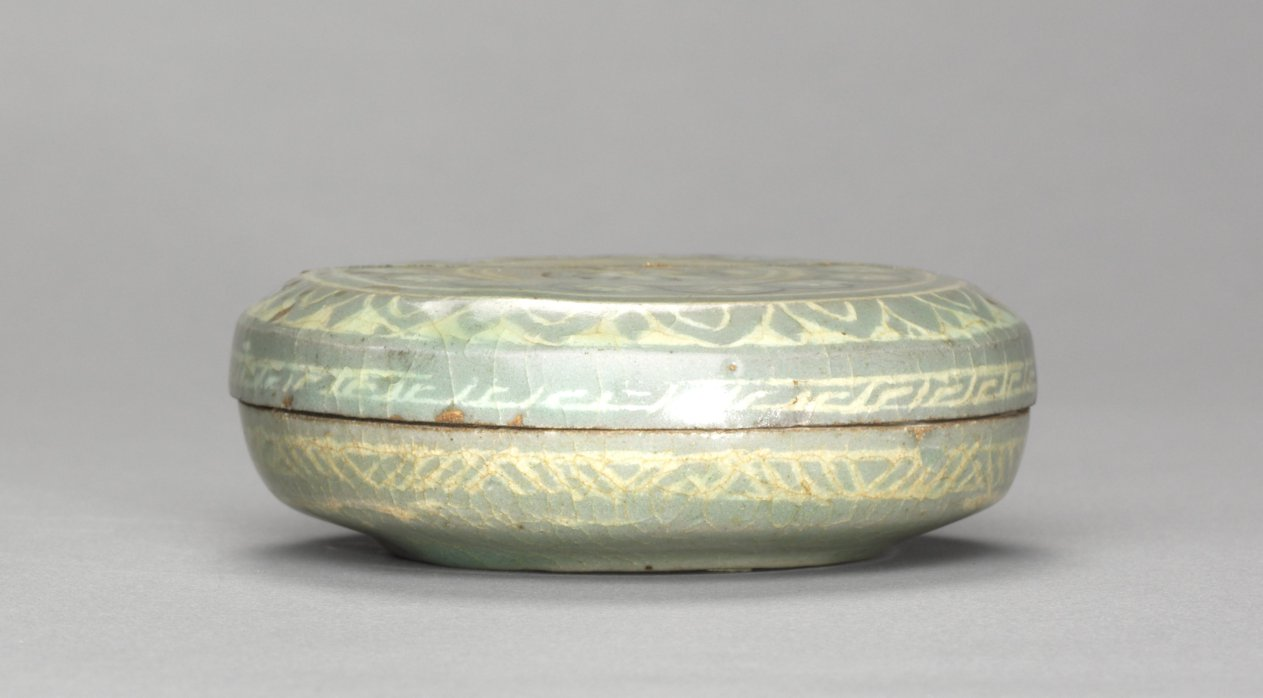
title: Box and Cover with Chrysanthemum and Scroll Design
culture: Korea, Goryeo dynasty (918–1392)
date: 1200s-1300s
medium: inlaid celadon ware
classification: Ceramic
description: Celadons, spoons, seals, and bronze mirrors were the most common burial objects in tombs during the Goryeo period (918–1392). Once used to contain colored powder, rouge, and eyebrow gel for makeup, this small container was one of the standard goods that furnished elites' tombs. Both women and men used the grain powder of rice or millet for whitening their skin, safflower extract for rouge, and plant ash or soot for eyebrow gel. Yet, natural-looking makeup seems to have been the most favorable one in Korea according to the travelogue by Xu Jing (1091–1153), the Chinese diplomat who visited Korea in 1123.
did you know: This ceramic container was used to store either incense or cosmetics.